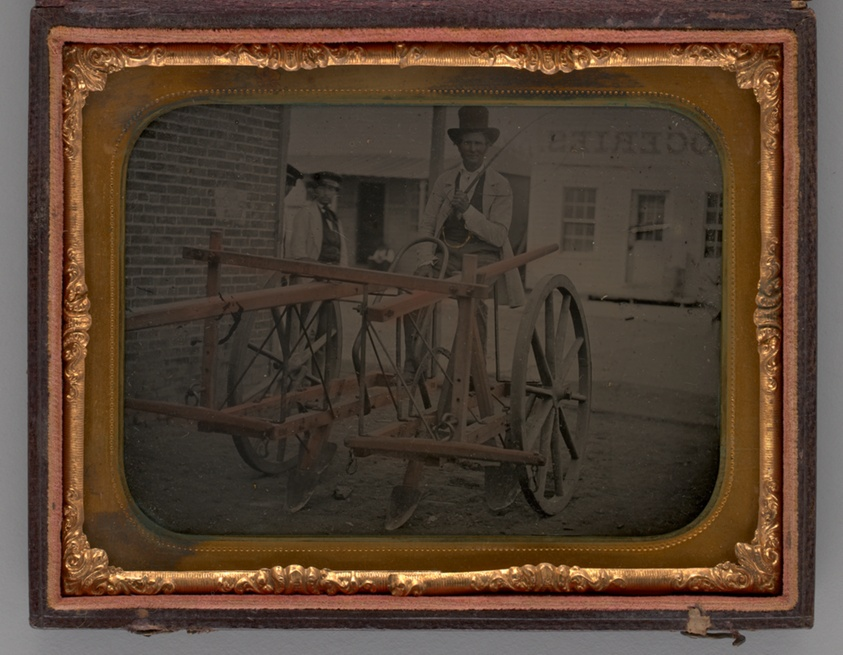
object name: Photograph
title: Untitled (Man with Top Hat Sitting on Carriage)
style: 19th century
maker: Unknown maker; American, 19th century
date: 1864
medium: Tintype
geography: United States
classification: portrait; tintype; portrait; photograph; photographic process; photography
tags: lundberg collection, portrait, portraits, portraits: male subject